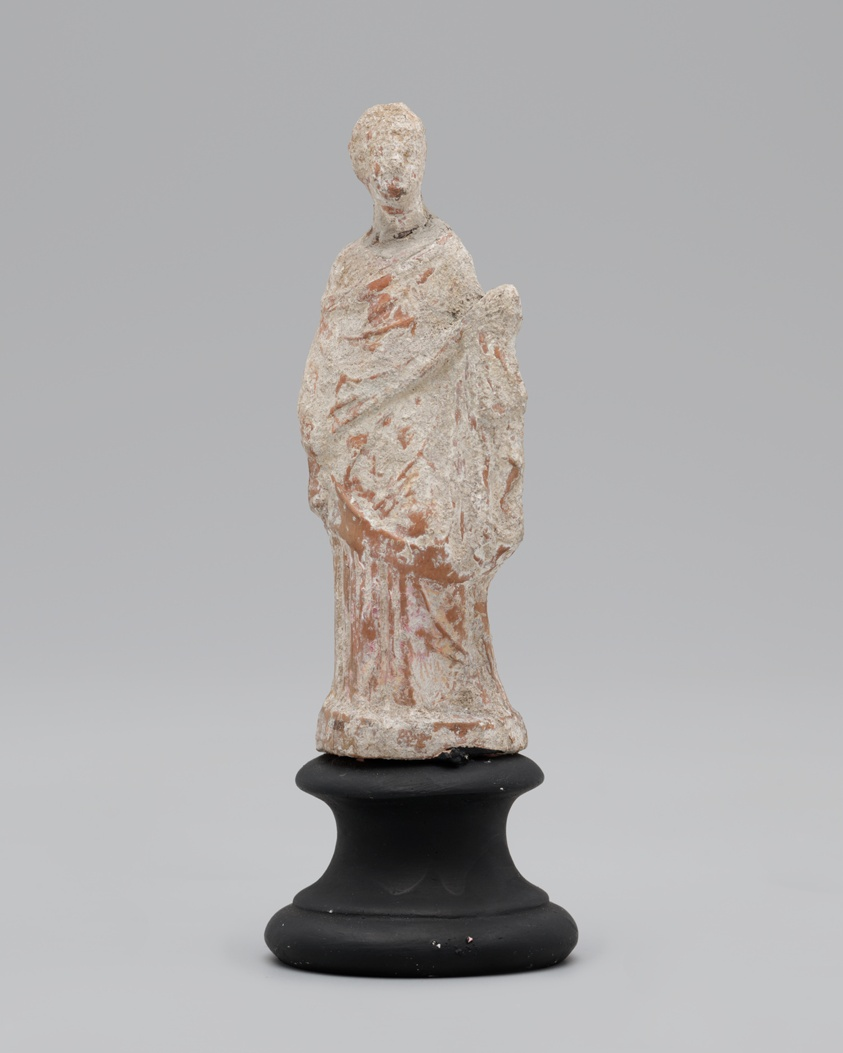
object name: Sculpture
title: Figurine of a Standing woman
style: greek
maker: Greek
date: 4th-3rd century BCE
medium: terracotta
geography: Greece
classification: earthenware; ceramics; sculpture; ancient art